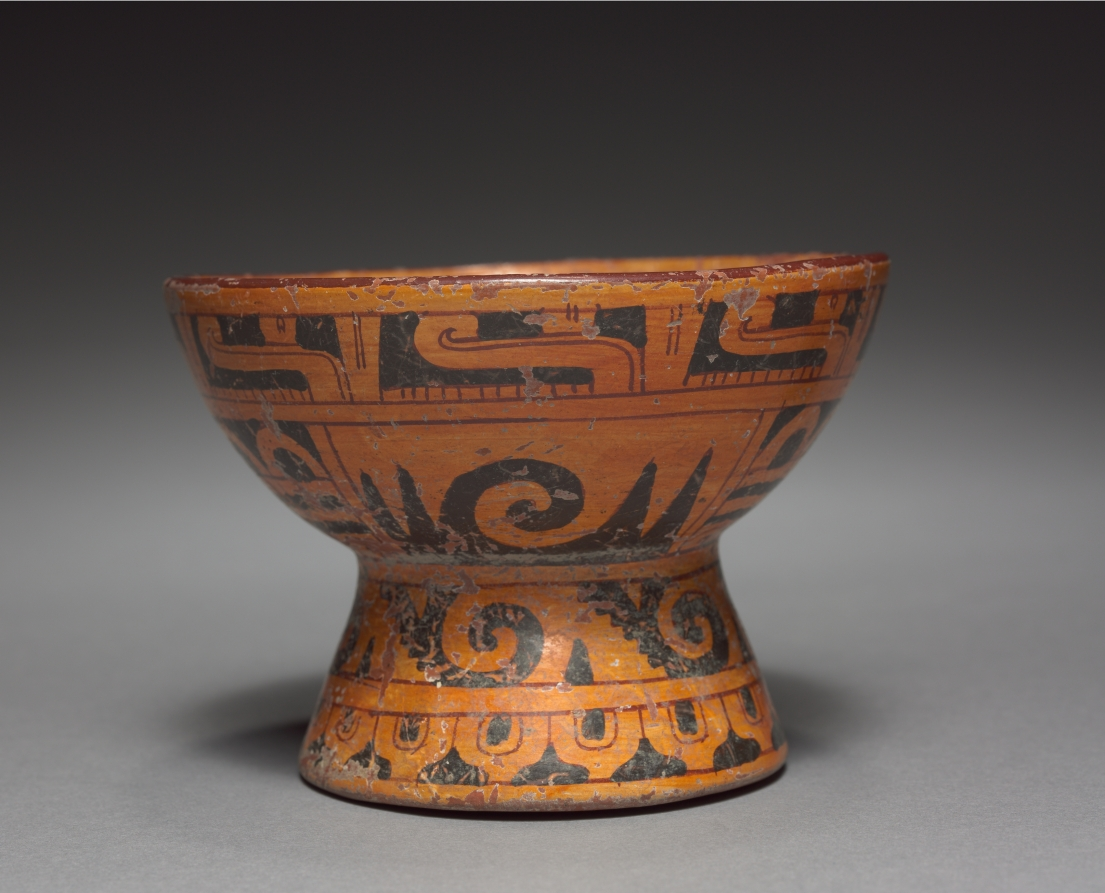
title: Bowl with Rattle Base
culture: Mexico, Cholula?, Mixteca-Puebla Style, 10th-16th century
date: c. 900–1519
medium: earthenware with colored slips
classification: Ceramic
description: The nobility may have used these goblets for a chocolate beverage or for pulque, made from the fermented sap of the maguey cactus. Both are painted with the precision and brilliant colors for which the Mixteca-Puebla style is renowned, and they carry some of the same motifs, such as the band of stylized animal heads at the top. The smaller bowl has a rattle base.